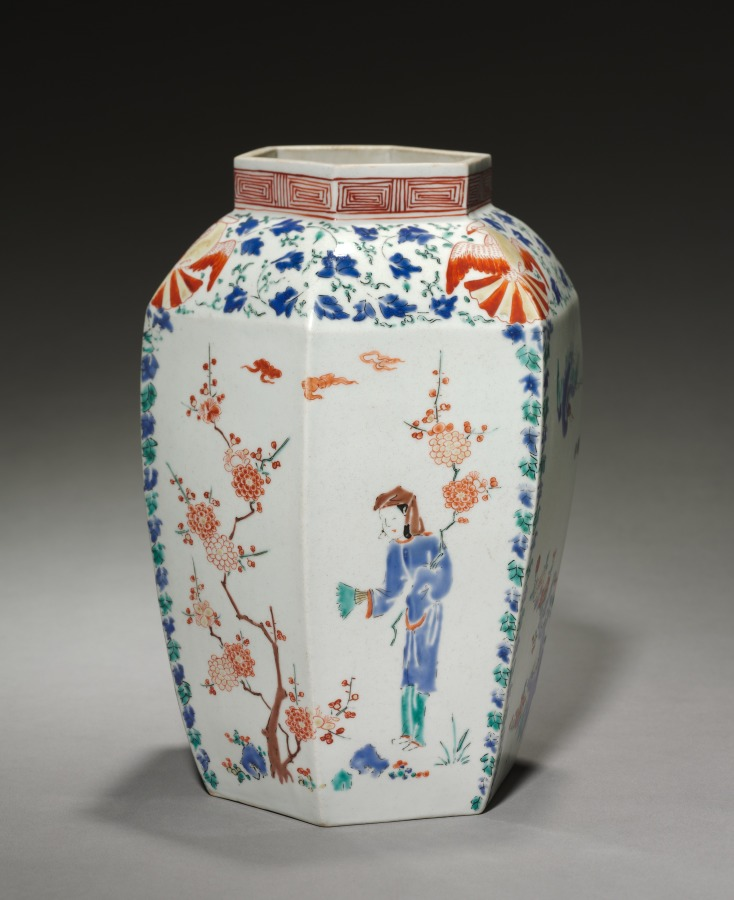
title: Pair of Hexagonal Jars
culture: Japan, Edo period (1615–1868)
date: late 1600s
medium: porcelain with overglaze color enamel and gold decoration (Hizen ware; Kakiemon type)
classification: Ceramic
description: This kakiemon-type jar with plum design is a product made for the European markets. Here, Japanese kakiemon potters transformed the typical plum, bamboo, and pine motifs into a theme appreciating the plum. The 9th-century Japanese scholar and politician Sugawara Michizane established the plum as a symbol of scholarship. An excellent poet, particularly of Chinese-style poetry, he was also well known for his love of plum blossoms. Later, the plum came to represent tenmangu, a shrine for Sugawara.